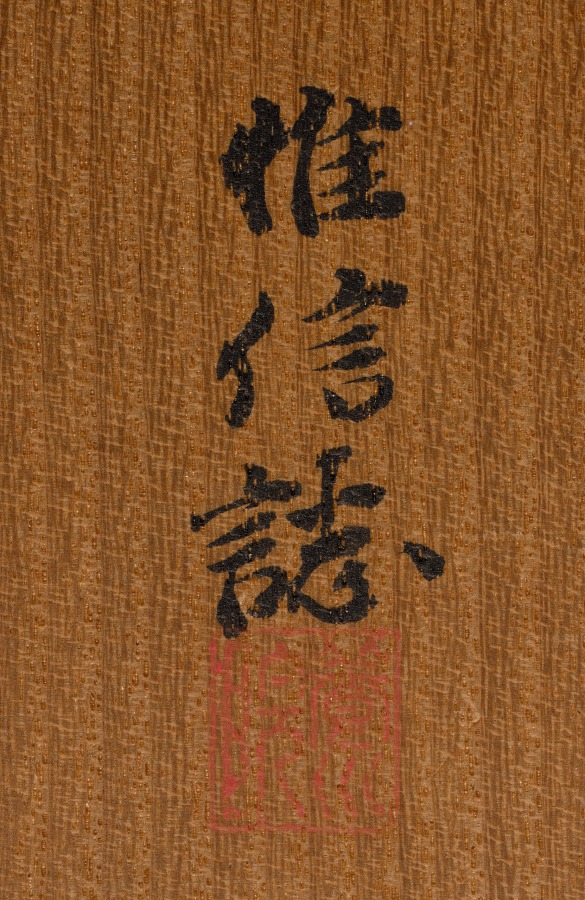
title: Windy Landscape with Sailboat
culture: Japan, Muromachi period (1392–1573)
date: mid-1400s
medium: hanging scroll; ink on paper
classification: Painting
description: Windy Landscape depicts the humble waterside retreat of an official retired from government service. For government officials, retreating from the city to a remote locale was the ideal retirement, though difficult to attain. In this scroll the retiree gazes out over the watery expanse past the sailboat to the mist-covered mountain in the far distance. The artist has achieved this depth of composition through carefully placed brushstrokes and ink washes.